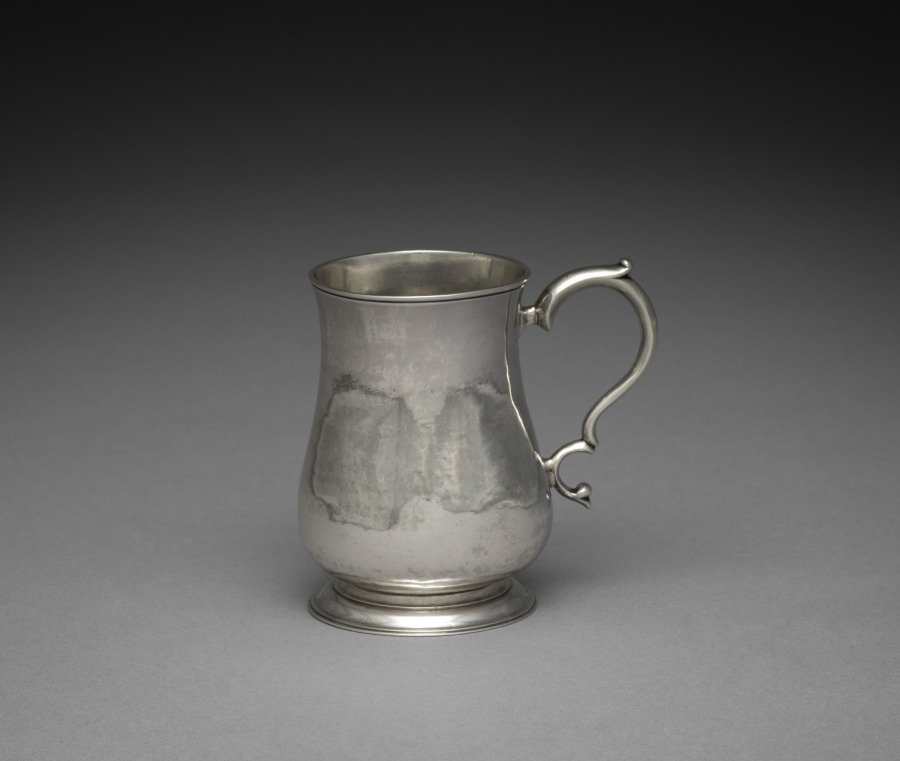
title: Cann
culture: America, Massachusetts, Boston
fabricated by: Benjamin Pierpont (American, 1730–1797)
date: c. 1760–70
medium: silver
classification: Silver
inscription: engraved "A*G" in block letters on bottom.